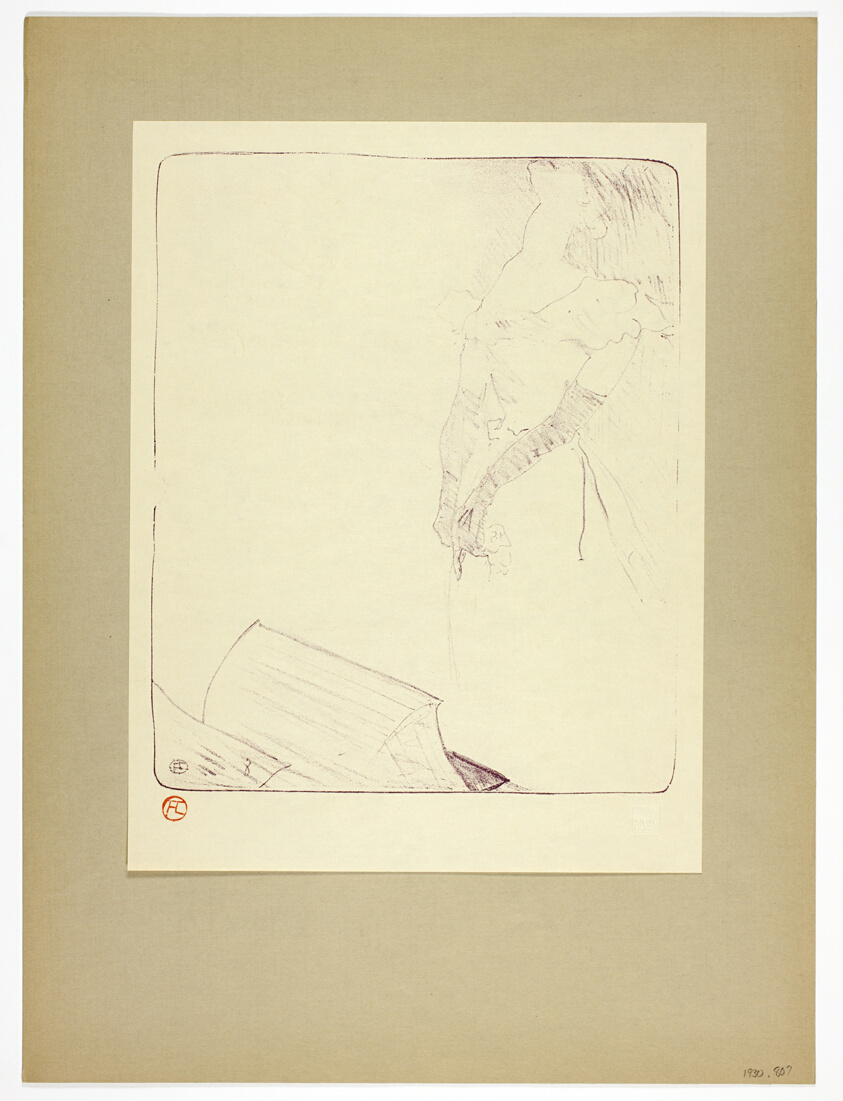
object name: Print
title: Frontispiece, from Yvette Guilbert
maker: Henri de Toulouse-Lautrec (French, 1864-1901); printed by Westminster Press (English, 20th century); published by the Ernest Brown & Phillips (English, 20th century)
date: 1898, printed 1930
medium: Lithograph (crayon transfer, see Wittrock) in purple or violet on cream wove paper hinged at top corners to gray-brown wove paper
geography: France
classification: lithograph; print; prints and drawing